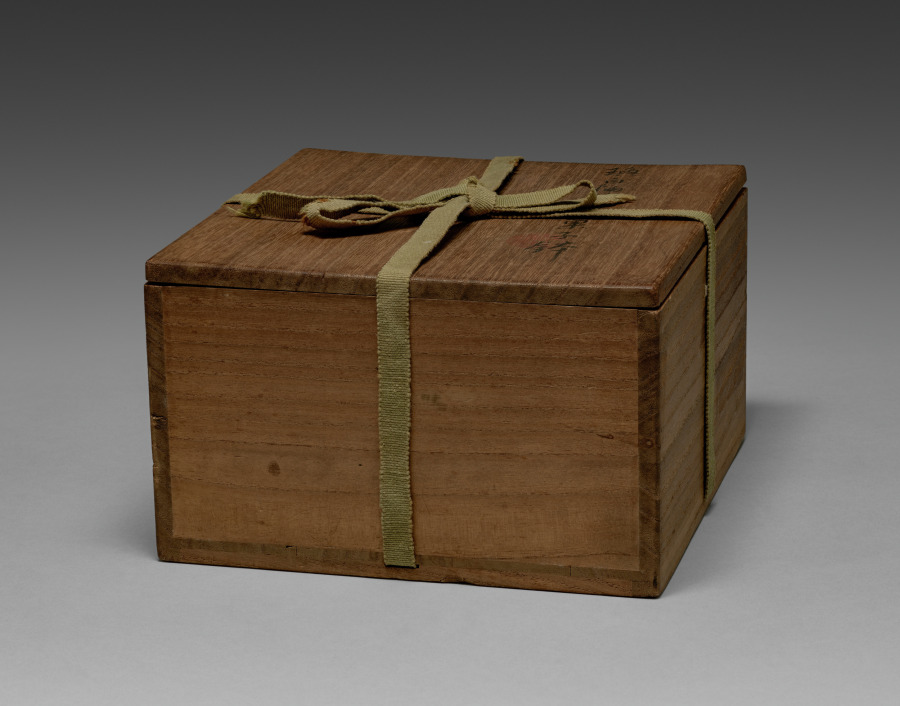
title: Sweets Bowl with Chrysanthemums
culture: Japan, Taishō period (1912–26) or Shōwa period (1926–89)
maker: Seifū Yohei IV (Japanese, 1872–1951)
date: 1914–46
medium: Porcelain with molded and carved design, underglaze color, and cream glaze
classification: Ceramic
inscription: 清風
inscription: 成山清風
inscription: 清風造 【印】 清風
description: Sweets bowls hold the confections enjoyed when drinking tea. This bowl and CMA 2022.206 offer an important lesson in appreciating Yohei IV’s ceramic practice. While they have the same design and shape and are made with the same materials, the execution of the pieces makes them entirely different after close inspection, thereby demonstrating the range of possible production results from a single template. Each bowl has the same composition of two different types of chrysanthemum flowers, one with long, slim, knifelike petals and the other with short, rounded, multilayered petals, shown running around its surface in low relief. The centers of the flowers are painted with yellow under the glaze. Yohei III formulated a number of new underglaze colors during his career, and this is likely one of them. For both bowls here, Yohei IV used his father’s kanpakuji formula, with underglaze pink for the gradated wash of color surrounding the flowers. The storage box lid provides abbreviated descriptions of the complex processes used in the surface decorations. It identifies the bowl as “Sweets dish with carved picture of chrysanthemum in kanpakuji.” The box has Yohei IV’s signature on the lid’s exterior, along with a seal reading “Seizan Seifu” 成山清風. The ink inscriptions are done in an elegant semiformal calligraphy. This bowl is more subtle and smooth in both the effect of the glaze and the execution of the relief. The designs are centered on the body between rim and foot. A closer look at the delineation of the flower petals reveals that the designs differ at times with respect to which petals appear in front or behind others. The centers of the bases of both bowls are incised with “Seifu” in a manner matching many other works by Yohei IV, although there are slight differences. As one might expect from the other differences in the bowls, the characters on the base of this subtle bowl are gentler, finishing in a tapering out of the strokes. Those on the bold bowl, CMA 2022.206, end in triangular pinheads.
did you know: This ivory and pink bowl by Seifū Yohei IV show his father’s “bright-jewel white porcelain” technique.